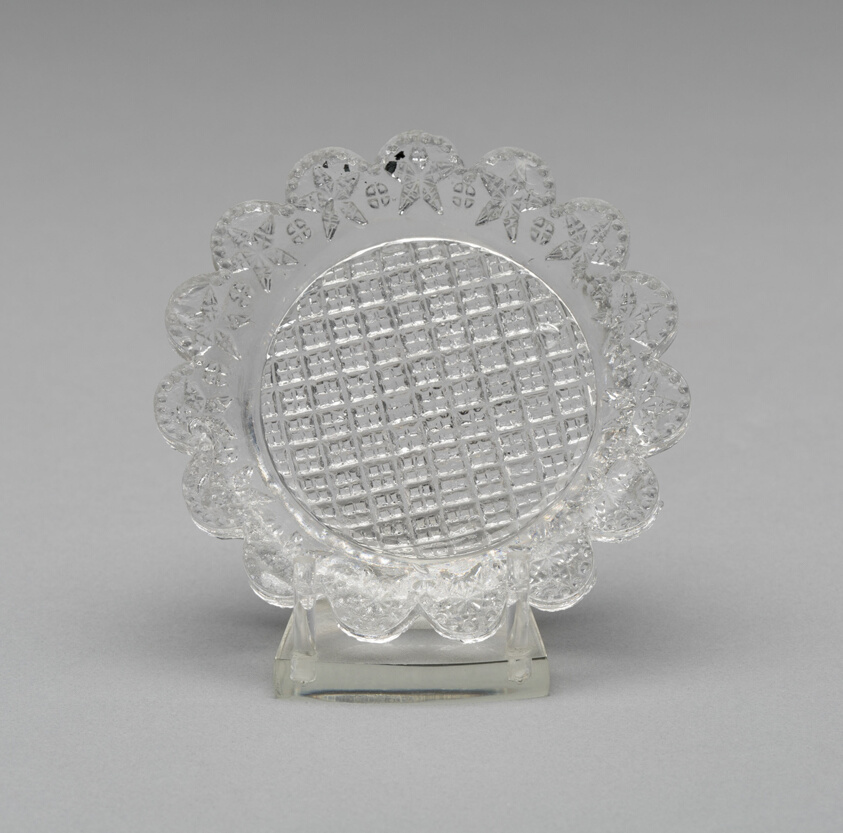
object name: Glass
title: Cup plate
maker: Artist unknown (American, 19th century); New England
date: 1826–30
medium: Pressed glass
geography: New England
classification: plate (general, dish); glass; american decorative arts; american arts; decorative arts